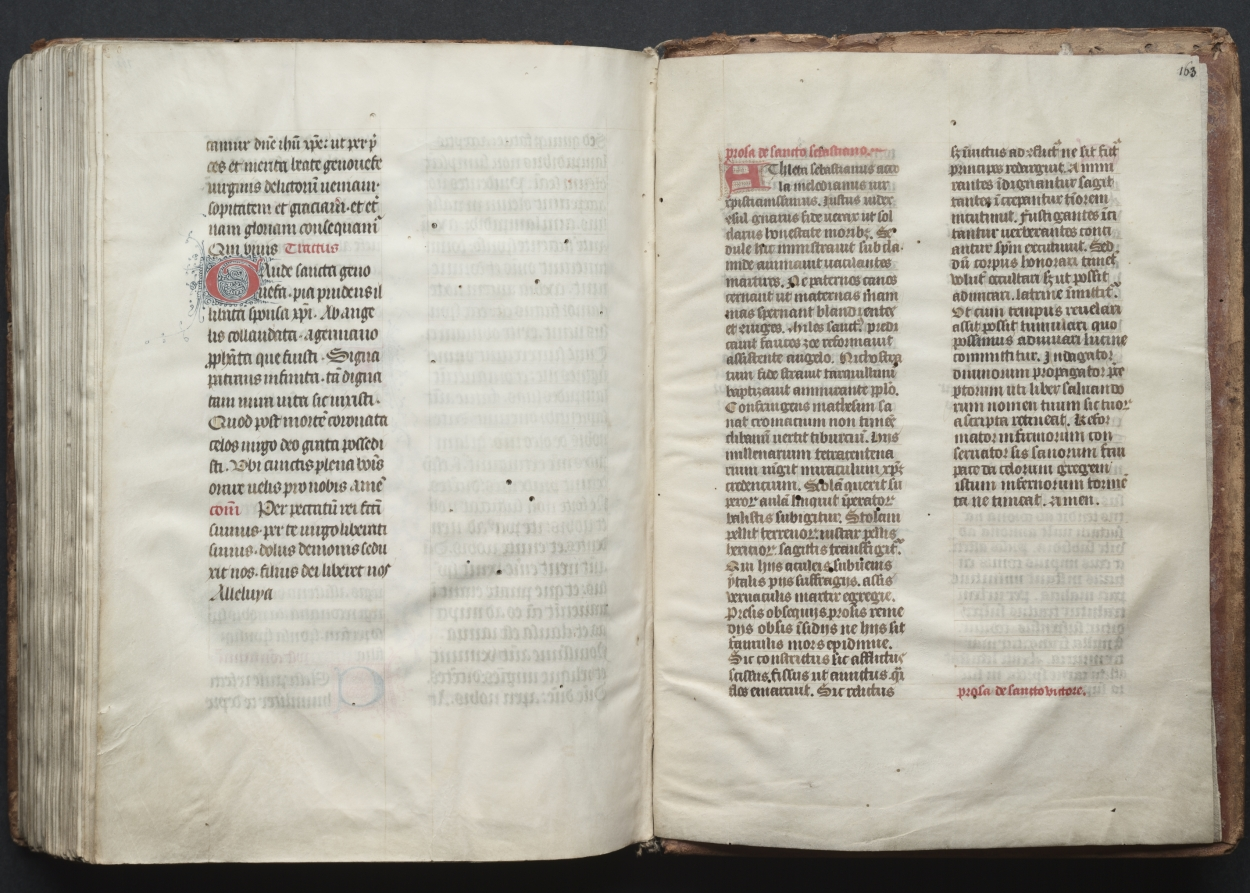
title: The Gotha Missal: Fol. 163r, Text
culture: France, Paris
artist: Master of the Boqueteaux (French)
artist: and Workshop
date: c. 1375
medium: ink, tempera, and gold on vellum; blind-tooled leather binding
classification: Bound Volume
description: The style and quality of this manuscript's decoration is typical of deluxe Parisian books made for aristocratic or royal patrons. Most of the book's decoration appears to be the work of the Master of the Boqueteaux, an artist active at the court of King Charles V (died 1380). His style was apparently shared by a number of book illuminators working in and around Paris. It is very possible that the Gotha Missal belonged to Charles V, but is not provable because the manuscript has no royal portraits and lacks a colophon. Given the book's magnificent decoration, however, it would seem that it was produced for a Valois prince, if not for the king himself. The manuscript receives its name from the German dukes of Gotha, its later owners.